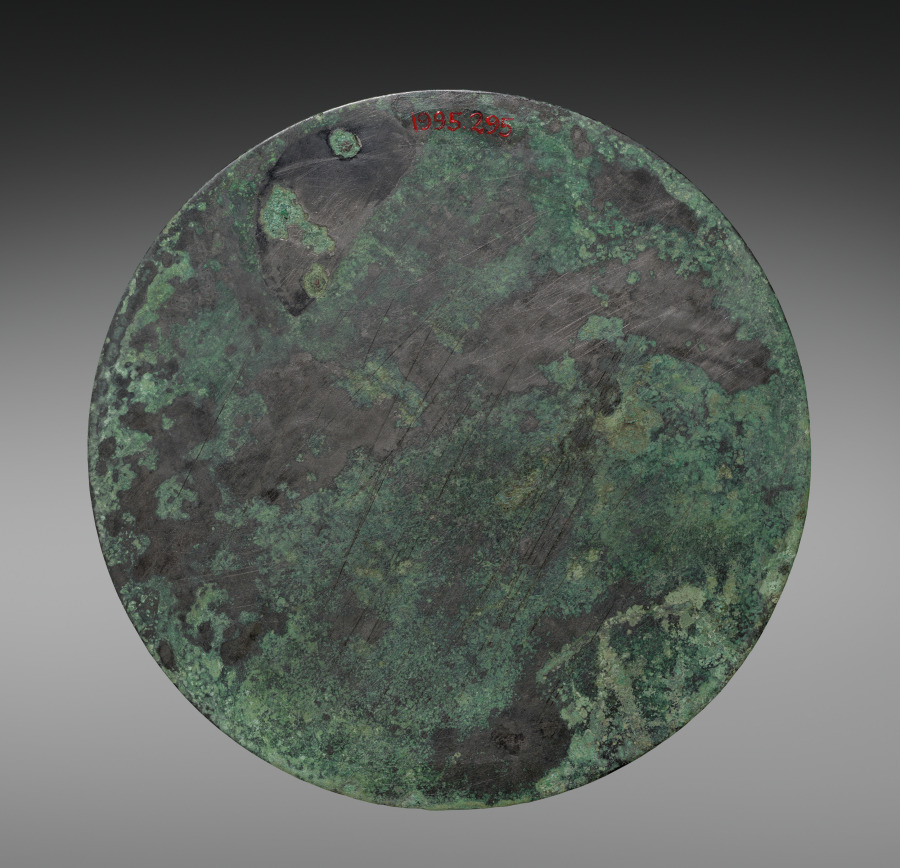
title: TLV Mirror with Multiple Nipples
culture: China, Xin dynasty (9–23 CE)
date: 9–23 CE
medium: bronze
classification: Metalwork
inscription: 新有善銅出丹陽， 和以銀錫青且明。 左龍右虎主四澎（旁） 八子。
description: TLV mirrors of the Han dynasty were named after the motifs resembling the letters T, L, and V. Their meaning relates to cosmology. A concentric band of characters around the central knob reads, Good copper of the current Xin dynasty was mined at Danyang. / Mixed with white tin, the alloy is clear and bright. . . . Danyang county in Jiangsu province was rich in metal resources. Mirrors mentioning Danyang were found in Zhejiang, Hubei, Henan, Hunan, and Shanxi provinces, which suggests their export beyond Jiangsu. Alternatively, competing mirror makers elsewhere could have used Danyang as an early type of branding.